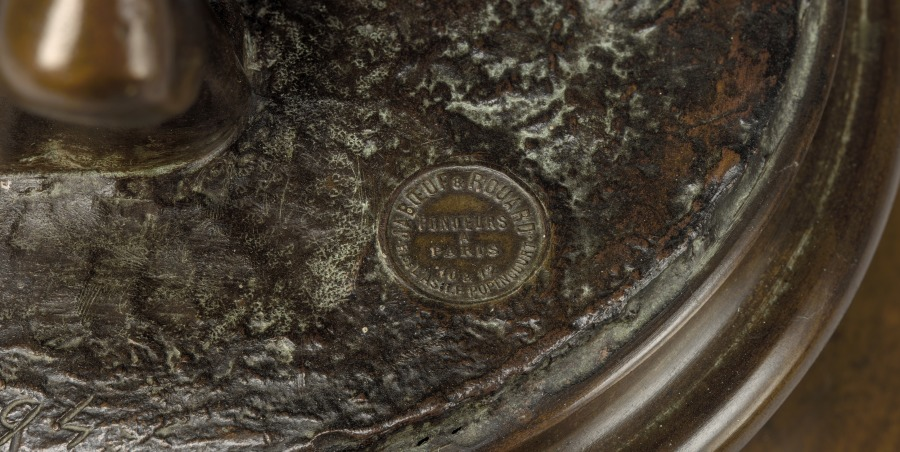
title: Bacchante and Infant Faun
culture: America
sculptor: Frederick William MacMonnies (American, 1863–1937)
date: 1894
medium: bronze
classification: Sculpture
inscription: Signed on base: F. Macmonnies, 1894.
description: This sculpture is a smaller version of a three-quarter life-size bronze given by the artist to Charles McKim, the architect for the Boston Public Library who placed the statue in the fountain of the library's courtyard. Although the vast majority of Bostonians supported the statue, a small but powerful group denounced it as "debauched," "vice-ridden," and "treason to purity and sobriety and virtue, and Almighty God." The opponents included the Boston Brahmins—a group of Anglo-Saxon, Protestant elite—and various religious, temperance, and antivice organizations. Feeling threatened by the swell of immigrants and by the changing roles of women, these groups hoped that the library would offer an alternative to the saloons frequented by Boston's lower classes. But a statue of a nude woman reveling under the effects of wine from the Roman god Bacchus only devalued this bastion of civilization. Consequently, the Boston Art Commission rejected the statue in 1897. However, in 1992 Boston's Art and Humanities commissioner and the library trustees returned a version of the original to the courtyard without public protest.